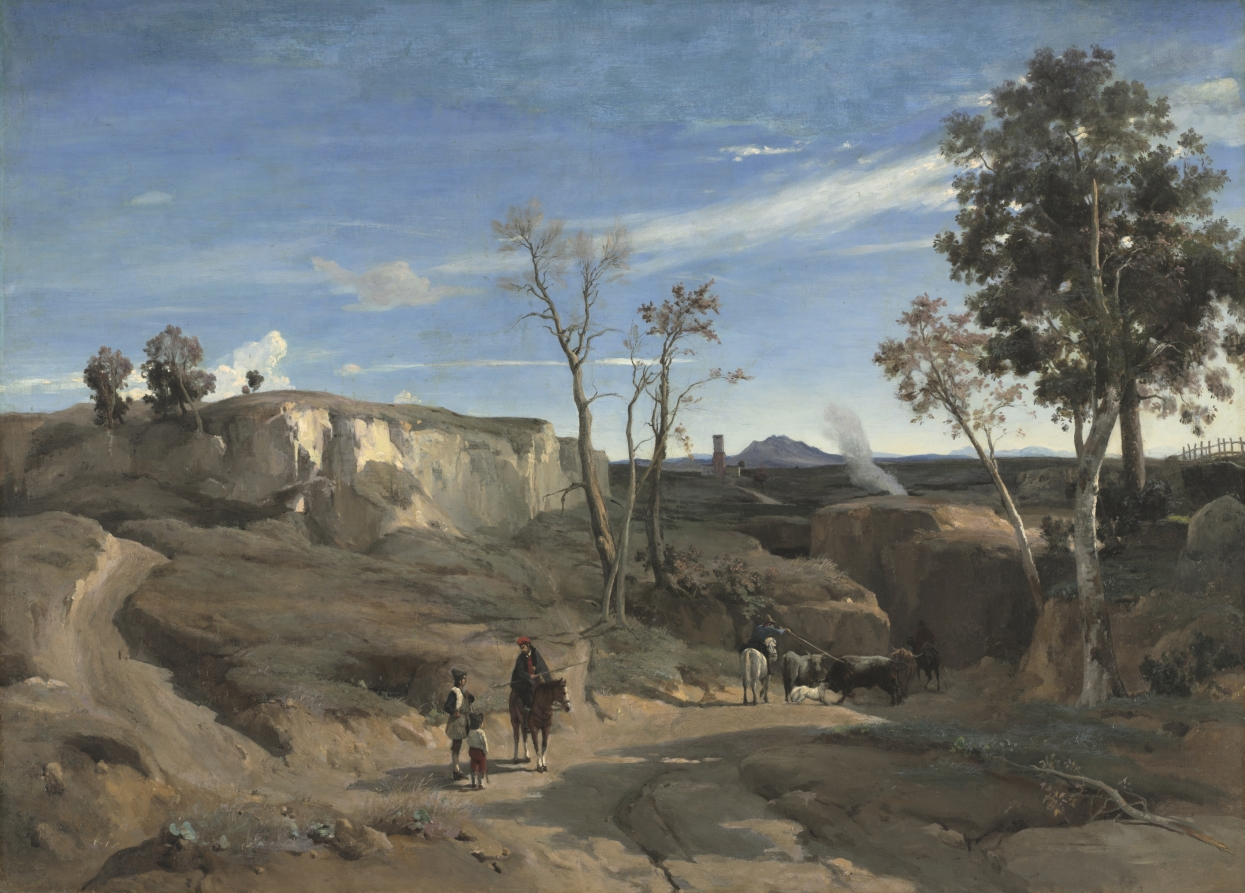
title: La Cervara, the Roman Campagna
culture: France, 19th century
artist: Jean Baptiste Camille Corot (French, 1796–1875)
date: c. 1830–31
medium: oil on fabric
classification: Painting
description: Corot based his large oil painting on drawings and oil sketches made outdoors. Attracted to the beauty of the Italian countryside, he often sketched around Rome, where he lived from 1825 to 1828. This painting's highly structured composition, based on forms moving into the distance along a series of diagonals, is characteristic of Corot's early style and recalls the classical landscapes of 17th-century painter Nicholas Poussin.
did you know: In 1845, the French poet Charles Baudelaire proclaimed Corot the leading painter of the modern landscape.